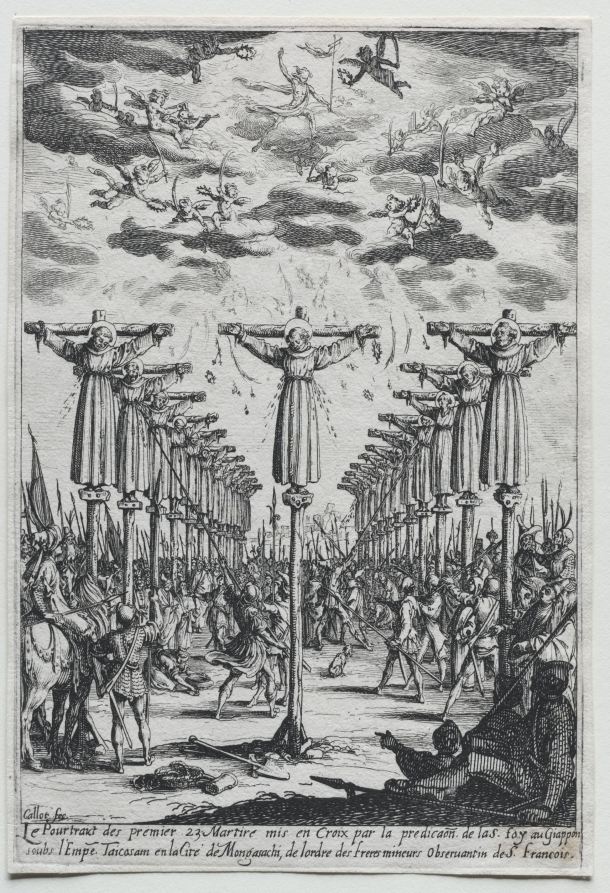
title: The Martyrs of Japan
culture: France, 17th century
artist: Jacques Callot (French, 1592–1635)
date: 1600s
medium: etching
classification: Print